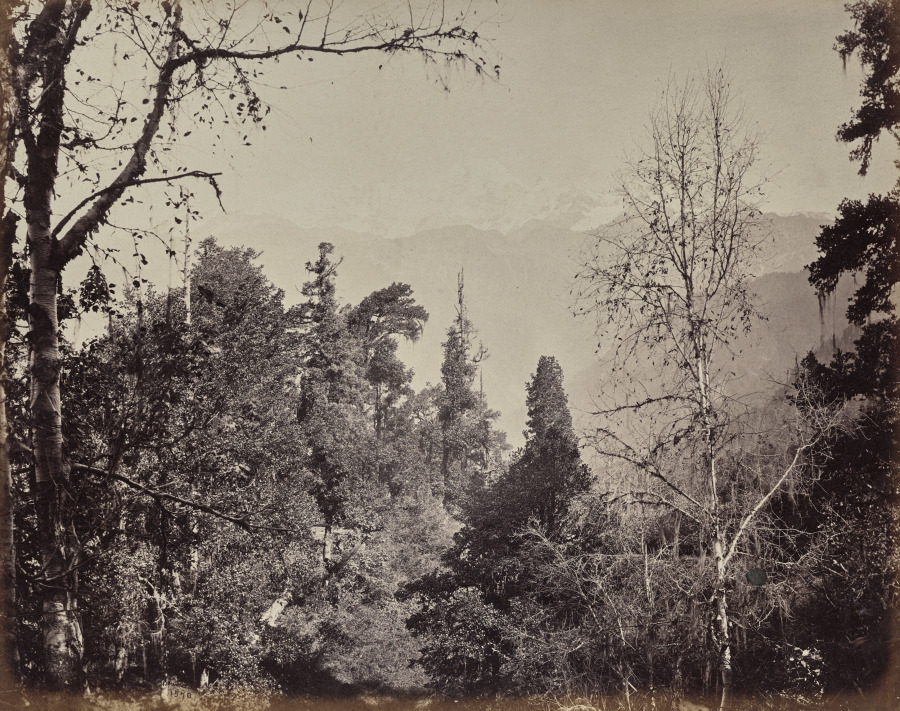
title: The Upper Himmalayahs. View of the Mountain of Bunderpoonch with the Jumnootri Peak, 20,458 above the Level of the Sea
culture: England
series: Photographs of Northern India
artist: Samuel Bourne (British, 1834–1912)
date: 1863–70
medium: albumen print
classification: Photograph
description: The 50 images in this album, all taken in the 1860s, move from the hill towns of the Himalayas down to cities including Lahore (now in Pakistan), Delhi, Lucknow, Agra, Benares (now Varansi), and Calcutta (now Kolkata). Architectural studies of major monuments offer valuable historical records of what sites such as the Taj Mahal and the imperial mosque of the Mughal emperors in Delhi looked like before twentieth-century restorations.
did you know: Samuel Bourne, the author of most the images in this album, was a banker in England before he moved to India to become a professional photographer.